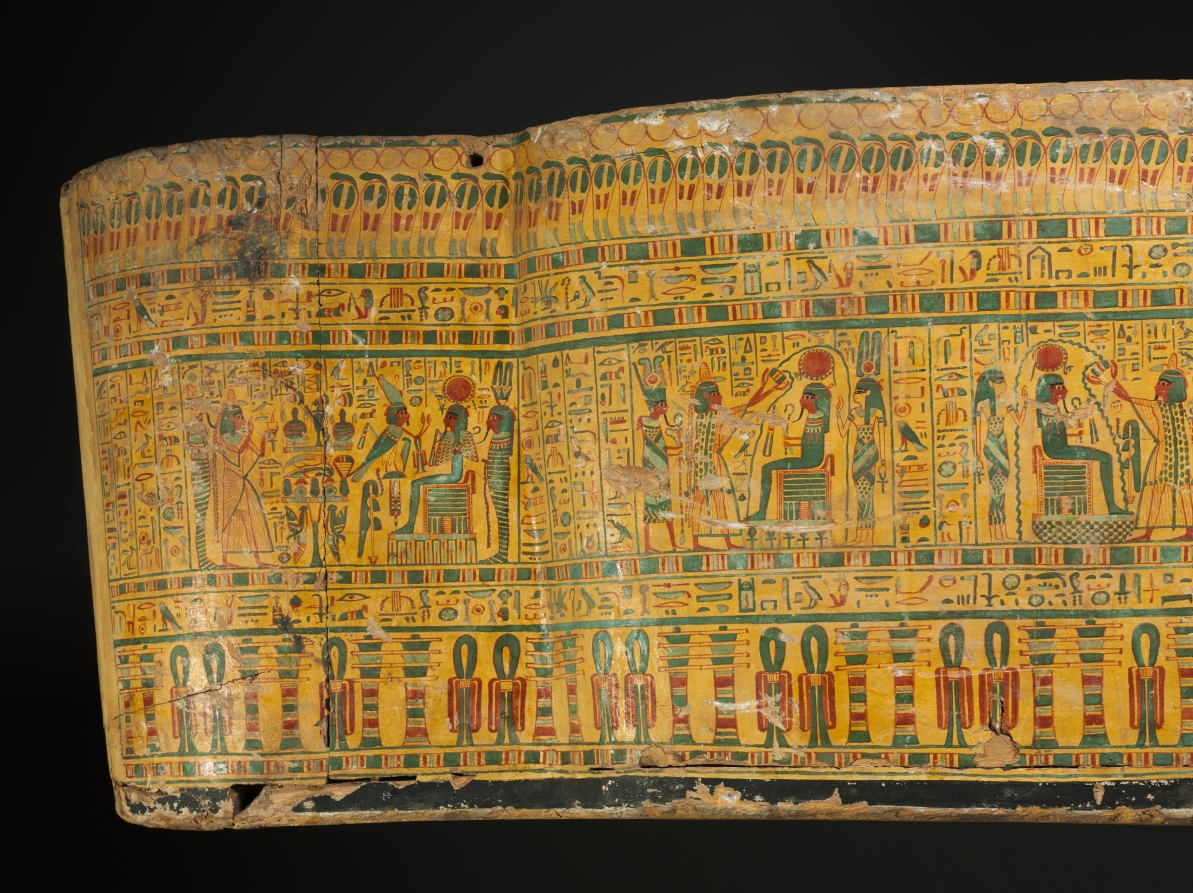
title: Coffin of Bakenmut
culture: Egypt, Thebes, Third Intermediate (1069–715 BCE), Dynasties 21–22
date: c. 1000–900 BCE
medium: gessoed and painted sycamore fig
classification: Funerary Equipment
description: The coffin of Bakenmut is one of the finest examples of painted wooden coffins made for the priests of Amen and their families at Thebes during Dynasty 21 and early Dynasty 22. The pharaohs of this time were no longer buried in the Valley of the Kings, but instead built tombs in the Delta, far to the north, where they resided. Security was lax in the Theban necropolis. The coffins and funerary goods of the wealthy citizens of Thebes were placed in unmarked and undecorated family tombs cut into the cliffs on the west bank of the Nile. All the care and detail that in more prosperous times were devoted to the decoration of the tomb chapel were now lavished on the elaborately painted coffins. Every available surface is crowded with religious scenes, images of funerary gods and goddesses, protective spells, and magical symbols. The deceased appears mummiform. An elaborate floral collar entirely covers the upper body, exposing only the separately attached hands (now lost). A pair of red "mummy braces" are crossed over the chest, their point of intersection marked by a winged sun disk. The lower body is covered with tiny figures modeled in gesso against a yellow background, which gives the effect of gold inlaid with glass or semiprecious stone. The decoration on the interior features two deified dead kings of Dynasty 18. Although these rulers had lived centuries before, memory of their greatness was still very much alive. The main scene near the top depicts Tuthmosis III, the great military pharaoh, who lived 500 years before Bakenmut. Posed as a mummy, the ruler wears a brilliant feathered garment enfolding him with falcon’s wings. The scene below features back-to-back seated images of Amenhotep I, regarded as the patron of the Theban cemetery and worshiped as a local god there.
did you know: Originally another smaller coffin was placed inside this outer coffin and in that the deceased with a mummy board would have rested.